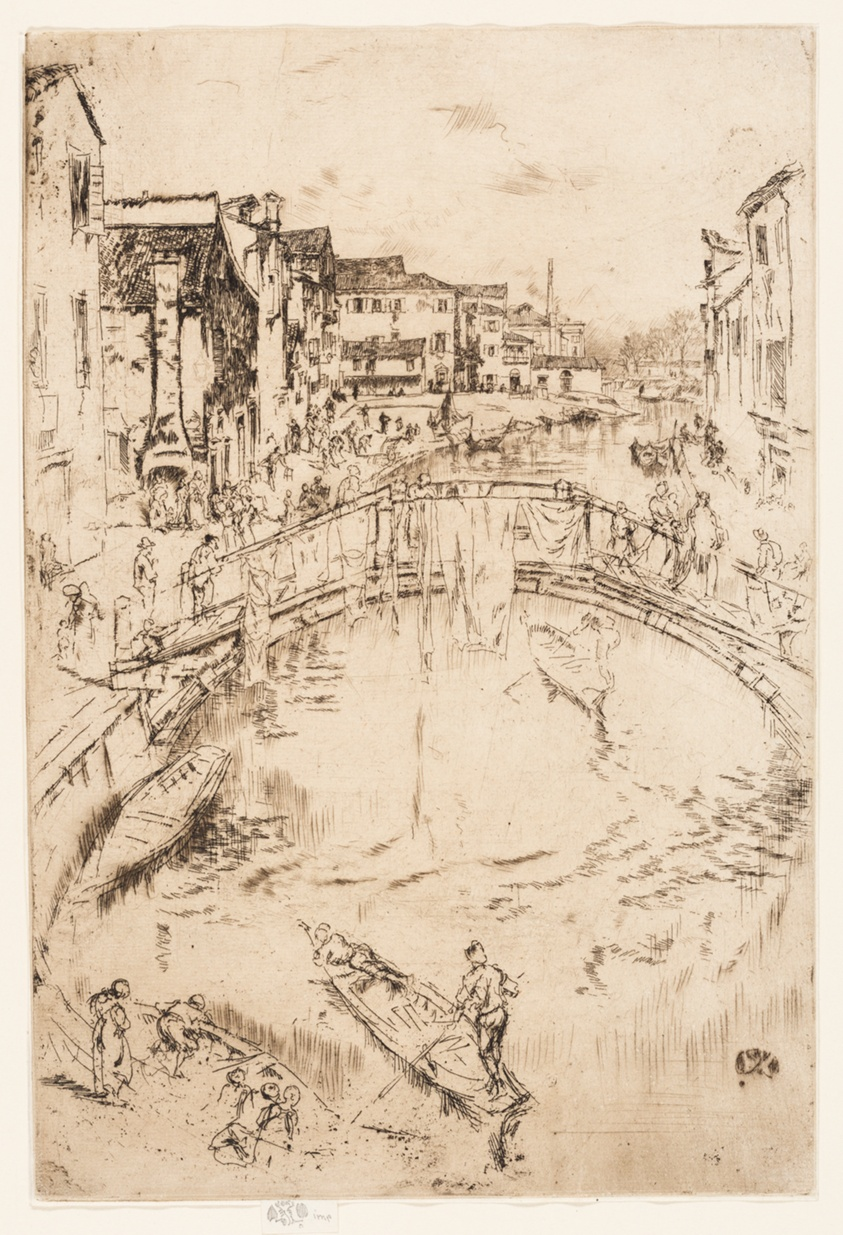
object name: Print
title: The Bridge, Santa Marta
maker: James McNeill Whistler (American, 1834-1903)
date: 1879/80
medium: Etching and drypoint with foul biting in black ink on off-white laid paper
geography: United States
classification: etching; foul biting; drypoint; print; prints and drawing; paper